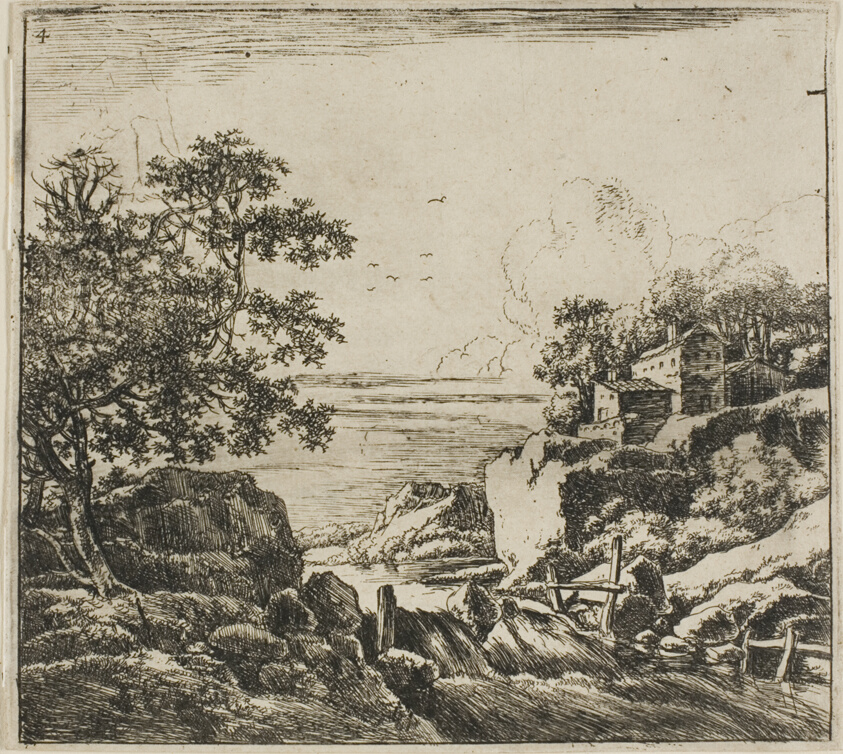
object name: Print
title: The Cascade, from the series Set of Landscapes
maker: Herman Naijwincx (Dutch, 1623-after 1651)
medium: Etching on ivory laid paper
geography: Netherlands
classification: etching; print; prints and drawing